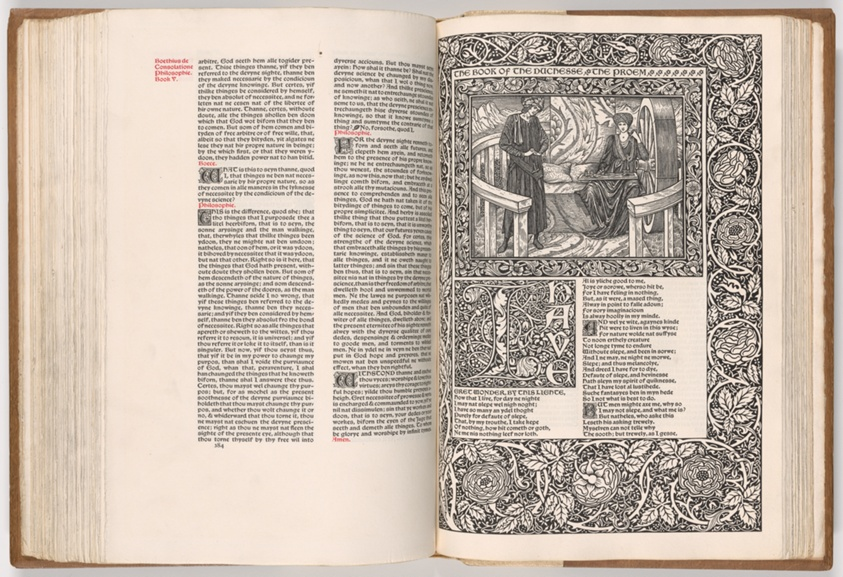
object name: Book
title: The Works of Geoffrey Chaucer Now Newly Imprinted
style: Arts and Crafts Movement, 19th century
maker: William Morris (English, 1834–1896); Illustrated by Sir Edward Burne-Jones (English, 1833-1898); Engraved by William Harcourt Hooper (English, 1834-1912)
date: 1896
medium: Hand-printed book on Batchelor linen paper, bound with tooled white pigskin on oak board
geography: England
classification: book; ink on paper